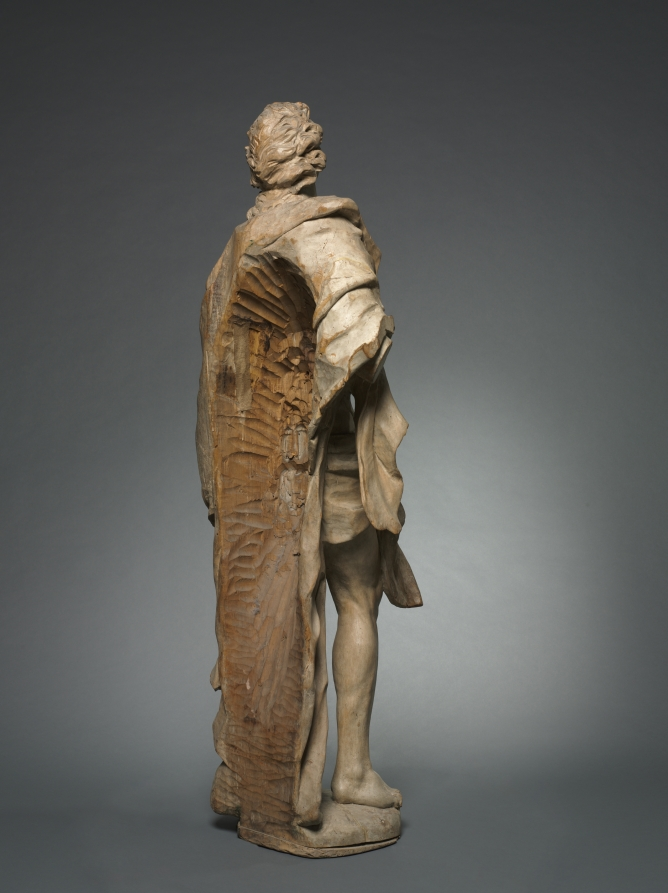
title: A Saint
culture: Germany or Austria, 18th century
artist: follower of Diego Francesco Carlone (Italian, 1674–1750)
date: c. 1730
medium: wood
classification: Sculpture